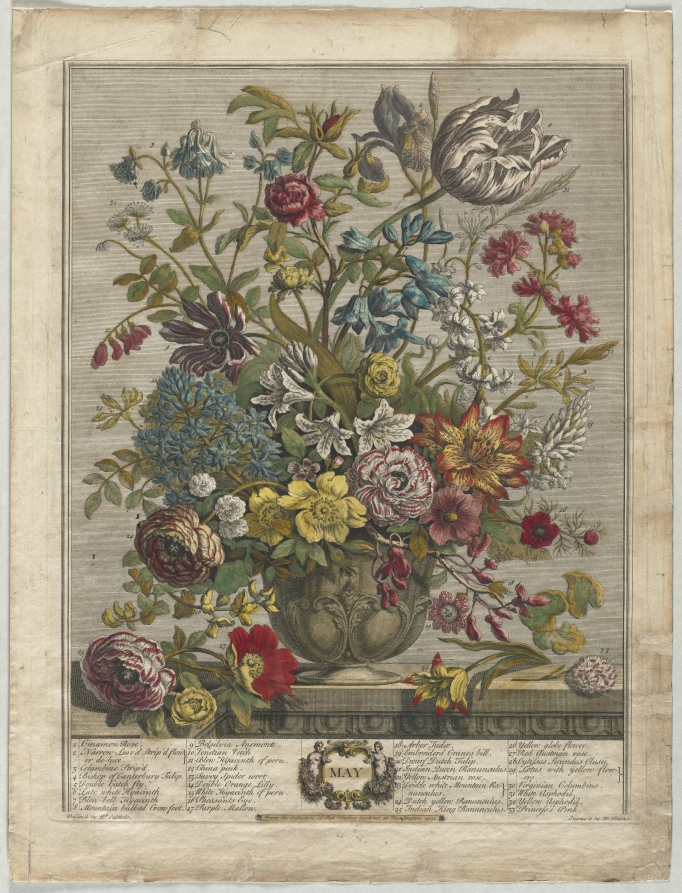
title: Twelve Months of Flowers: May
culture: England, 18th century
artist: Henry Fletcher (British, active 1715–38)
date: 1730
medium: engraving, hand-colored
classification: Print